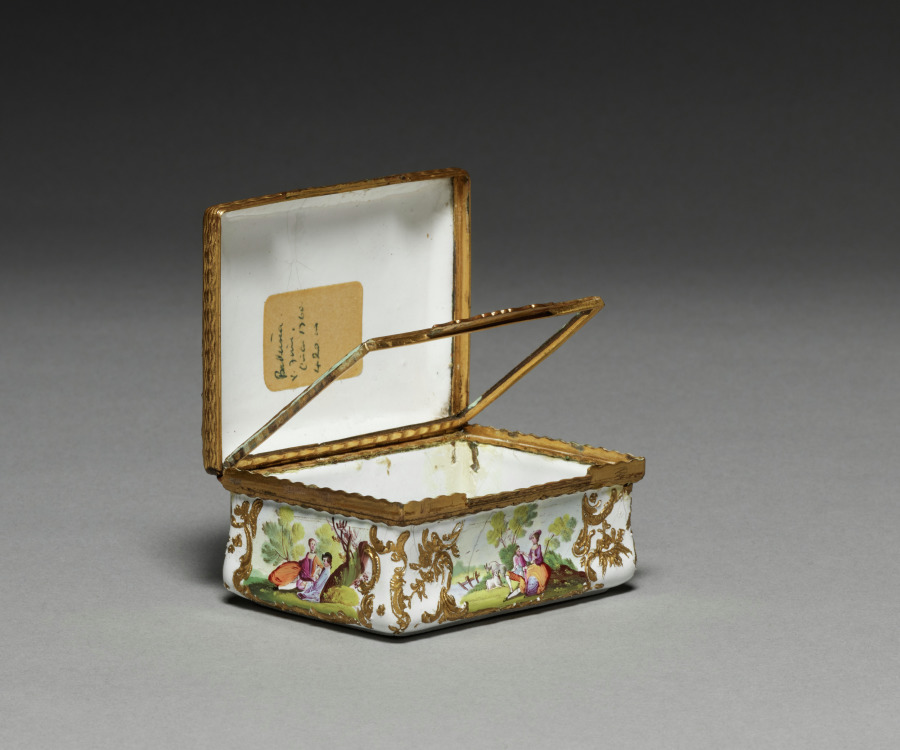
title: Box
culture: England, 18th century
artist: South Staffordshire Factory (British)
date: 1760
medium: enamel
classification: Enamel